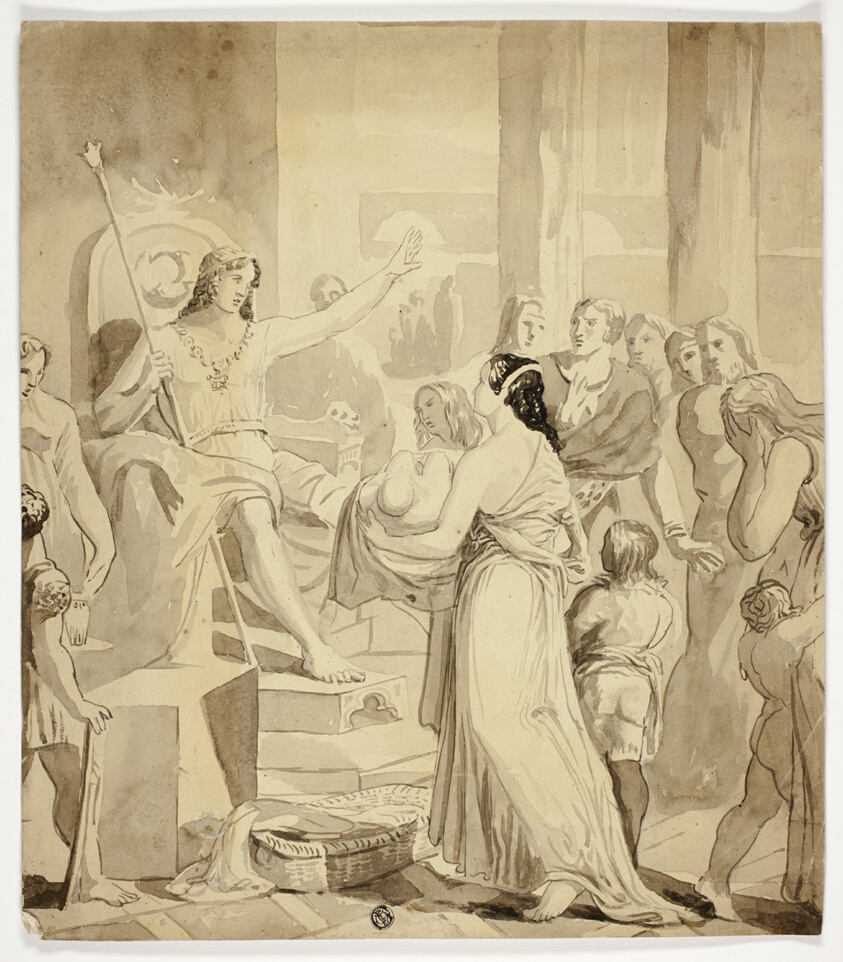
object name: Drawing and Watercolor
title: Scene from 'A Winter's Tale'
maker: Charles Robert Leslie (American, born England, 1794-1859)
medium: Pen and brown and black ink and brush and brown wash, over graphite, on cream wove card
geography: United States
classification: ink or chalk wash; paper; pen and ink drawings; brush and wash; drawings (visual works); prints and drawing